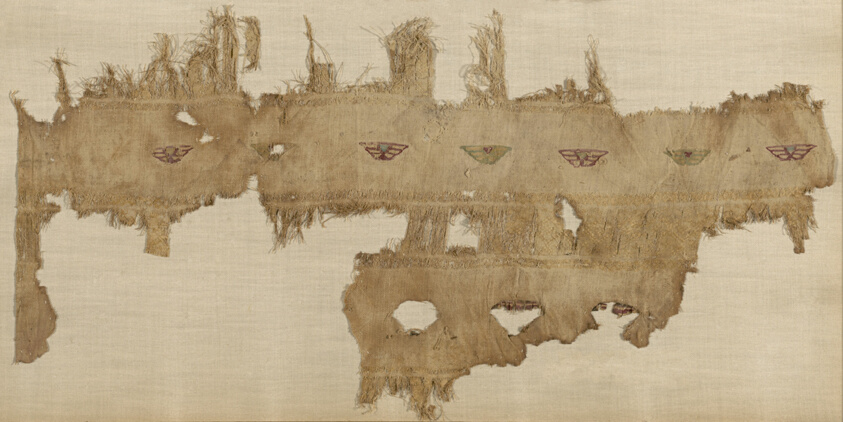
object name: Textile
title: Fragment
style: fatimid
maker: Egypt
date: Ayyubid period (1171–1250)/Mamluk period (1250–1517), 13th/14th century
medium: Linen, slit tapestry weave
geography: Egypt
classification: textile; weaving